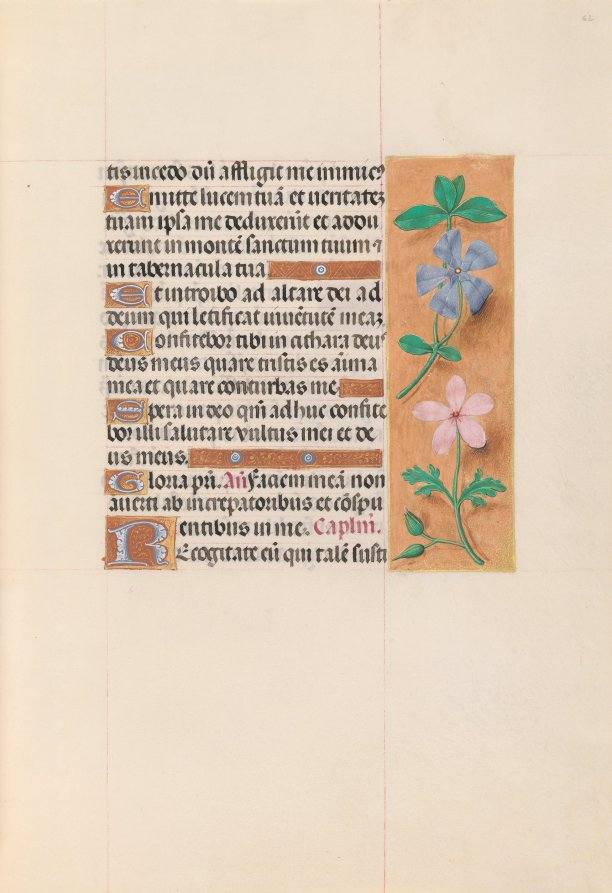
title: Hours of Queen Isabella the Catholic, Queen of Spain: Fol. 62r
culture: Flanders, Ghent and Bruges, late 15th century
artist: Master of the First Prayerbook of Maximillian (Flemish, c. 1444–1519)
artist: and Associates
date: c. 1500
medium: ink, tempera, and gold on vellum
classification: Bound Volume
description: This manuscript was illuminated by a circle of at least five highly organized manuscript painters active in the Flemish cities of Ghent and Bruges. The principal illuminator was Alexander Bening, who painted the majority of the book's miniatures. Manuscripts produced by this circle of artists are renowned for the decoration of their borders, which typically feature a rich variety of realistically-painted flowers, birds, and butterflies. This prayer book, called a book of hours, was intended not for a cleric, but for the private devotions of a lay person-in this case, Isabella the Catholic, Queen of Spain (1451-1504). Isabella's coat of arms embellishes the book's frontispiece. It is unlikely that the book was commissioned by the Queen herself; rather, she probably received it as a diplomatic gift from someone courting her patronage, perhaps Cardinal Francisco Jimenez de Cisneros. A Franciscan friar, Jimenez was dependent upon Isabella for his advancement, first to the post of Queen's confessor in 1492, and then to Archbishop of Toledo in 1495.